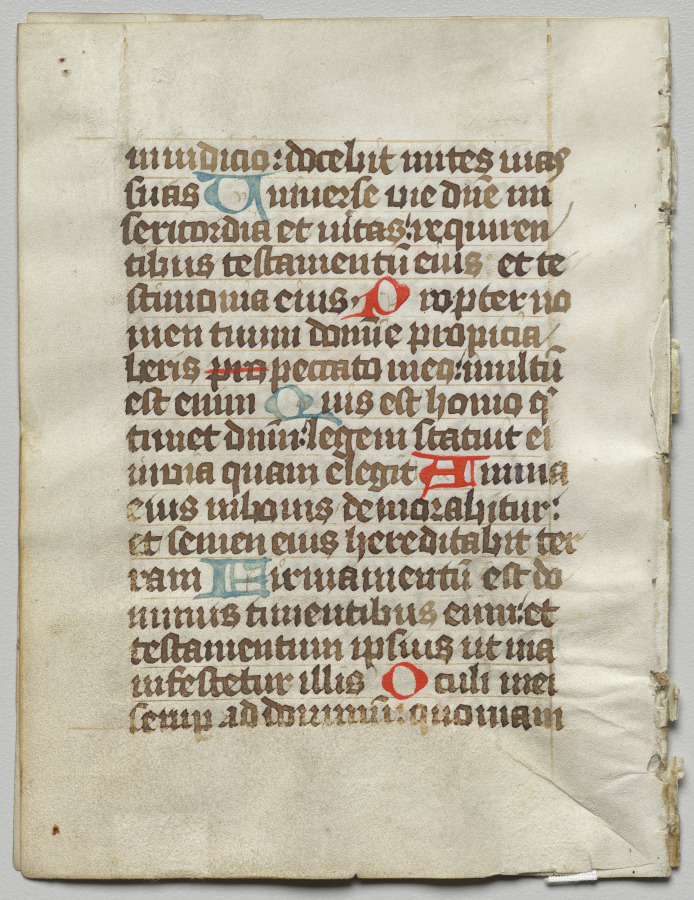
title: Bifolio from a Book of Hours: Initial V with Floral Border (recto)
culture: Austria (? ) or Bohemia (?), 15th century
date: c. 1460–1500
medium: ink, tempera and gold on vellum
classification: Manuscript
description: The word dirge, today meaning a mournful hymn for funerals, comes from the opening Latin in the Office of the Dead, seen just after the decorative letter A at upper left. During the Middle Ages, dirge became the shortened way to refer to the Office of the Dead. Although primarily recited at funerals, the office was also prayed at home as a reminder of mortality and a protection against sudden death. Surrounding the text, which contains Psalm 5, is a border decoration of acanthus leaves, believed to grow in paradise, as well as a parrot, a squirrel, a beetle, and flowers.